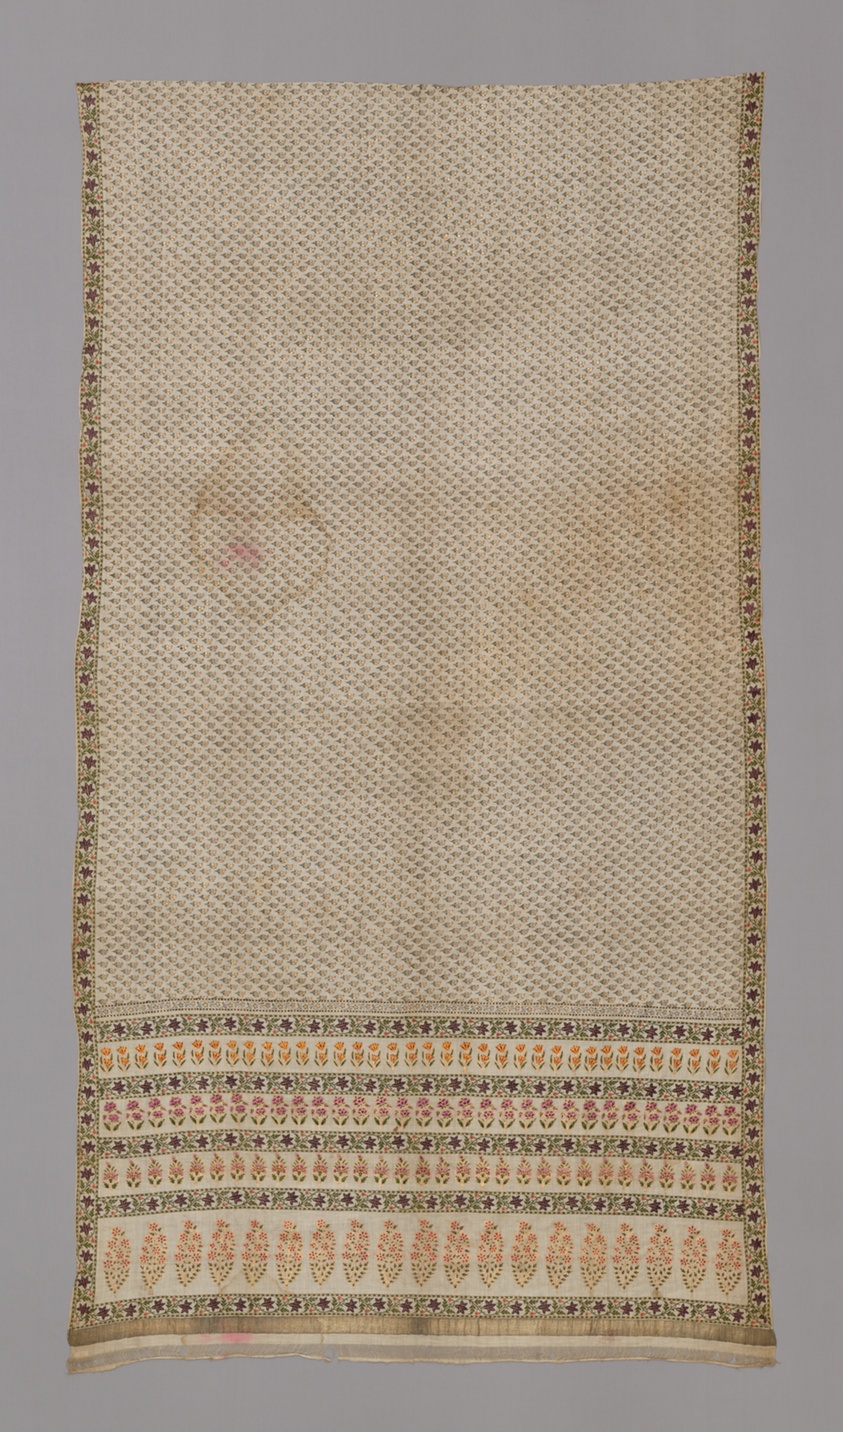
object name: Textile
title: Fragment (From a Sari)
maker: India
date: early 18th century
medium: Cotton, plain weave; printed and painted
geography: India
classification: textile; weaving - printed; asian art; sari (garment)